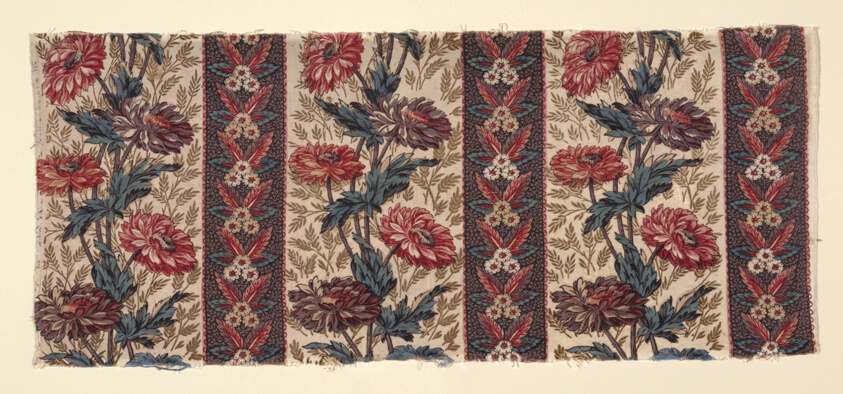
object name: Textile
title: Fragment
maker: England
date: 1775/1800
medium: Cotton, plain weave; probably roller printed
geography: England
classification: textile; weaving - printed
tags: flowers